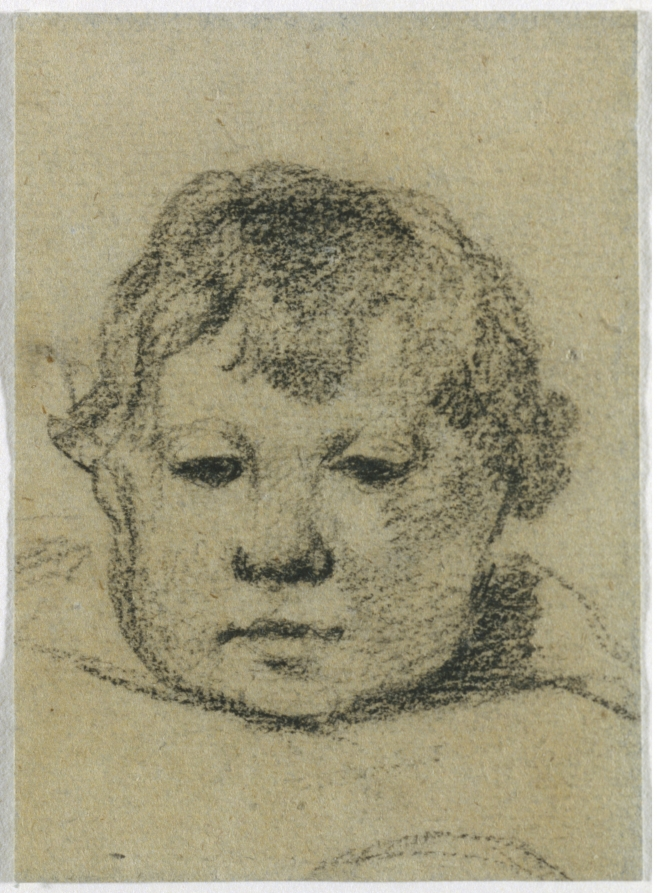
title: Emil Gauguin as a Child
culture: France, 19th century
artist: Paul Gauguin (French, 1848–1903)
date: c. 1875–1876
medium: black crayon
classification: Drawing